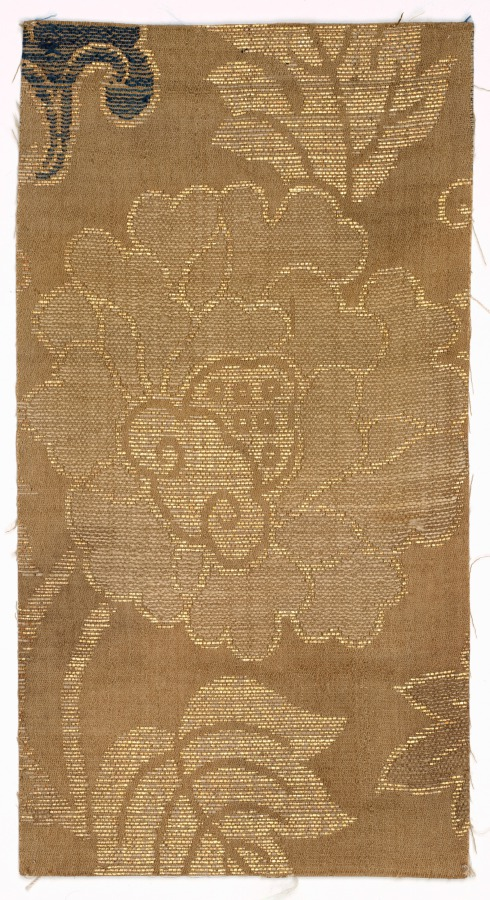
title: Textile Fragment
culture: Japan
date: 1800s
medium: silk, metallic thread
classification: Textile